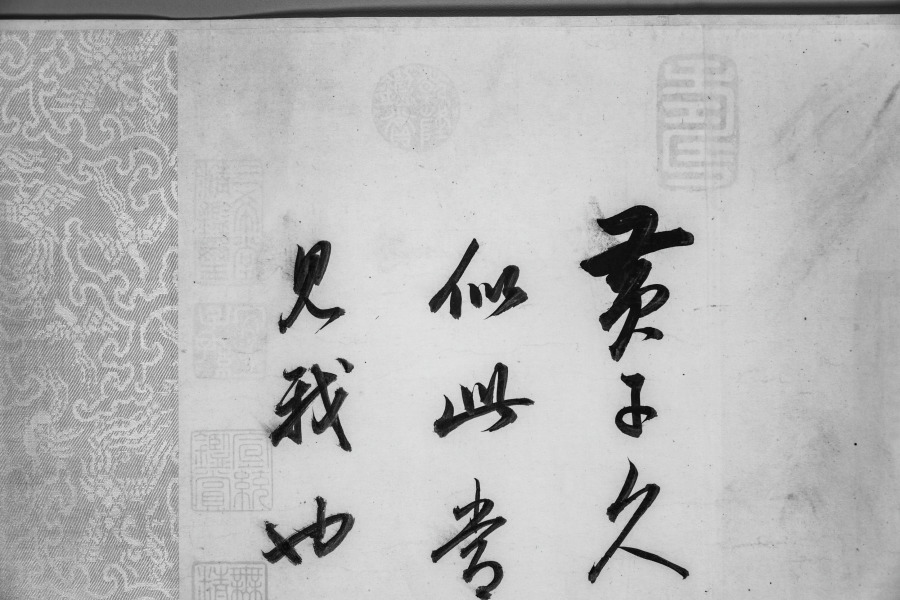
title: River and Mountains on a Clear Autumn Day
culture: China, Ming dynasty (1368–1644)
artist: Dong Qichang (Chinese, 1555–1636)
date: c. 1624–27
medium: Handscroll; ink on Korean paper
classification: Painting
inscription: 黃子久江山秋霽似此，當恨古人不見我也。思翁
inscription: 董文敏每遇高麗鏡面箋，書畫尤為入神。此卷改表紙用之，字跡隱然，兼有朝鮮之印。至於筆法圓秀，真接倪黃。豈文沈所可同日而語也。 康熙庚午中秋後一日，天氣澄爽，重裝初畢，跋於瓶廬。抱瓮翁高士奇。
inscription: Second inscription by Gao Shiqi 高士奇 (1645–1704): On the twenty-third day of the ninth month, the jiaxu year of the Kangxi era [1694], I packed my bags to head north. When my boat passed Wuchang [Suzhou], Mr. Mantang [Song Luo] brought wine to bid me farewell so that we could share our thoughts on our separation in the last few years. I showed him the paintings and calligraphy which I collected and asked his opinions. Since Mr. Mantang does not own any handscrolls by Wenmin [Dong Qichang], I leave this one for him in commemoration of our parting; thus the painting will have a worthy owner and our meeting will become a beautiful story in the future. It is the fourth day after the beginning of winter, with the sky clear and sober. Trees under frost have turned red and yellow, seemingly echoing the brush and ink in the painting. I also ask Mr. Mantang to inscribe a poem to commemorate our meeting so that it will survive forever.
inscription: 1 colophon and 4 seals of Song Luo 宋犖 (1634–1713): Who is the foremost art connoisseur of our dynasty?/ Tangcun [Liang Qingbiao, 1620–1691] is dead, so the title passes to Jiangcun [Gao Shiqi]./ Leaving office, you retired for five years in the Lake region./ Fondling handscrolls and hanging scrolls from morning to evening./ You sent me your collection catalogue Xiao Xia Lu last year;/ It is indeed the true equal of [Zhou Mi's] Yun Yan Guo Yan./ This year you returned to the capital by imperial order;/ Your boat with calligraphy and paintings anchored at the river bank in Suzhou./ When we met each other you did not waste any time for conversation by poured out immediately/ From your "coral net" extraordinary treasures./ You produced incomparable scrolls, with gold-inscribed labels and jade rollers,/ Pouring out from bags and trunks, they were spread in disarray./ Without a word, I rolled and unrolled until my fingers were numbed,/ We sat straight, facing each other quietly, and never felt tired./ For three days we forgot about sleeping and food./ And at times we shouted our joy out loud, forgetting who is host or guest./ Your Dwelling in the Fuchun Mountains and the Yuansheng manuscript/ These peerless works I myself examined with delight./ As an added pleasure to the farewell dinner under the Maple Bridge,/ You allowed me to hold again this handscroll by Dong Qichang--/ The Misty River and Piled Peaks [by Zhao Mengfu] and this Clear Autumn Day are two extraordinary masterpieces./ In showing such life and spirit with "qi yun." the artists were truly "men of heaven."/ The Clear Autumn Day is not even three feet long,/ Painted on tributary Korean paper, it shines like silver./ Every building up and every turn of the mountains imitates nature,/ Every tree and every rock is removed from the commonplace./ From the beginning, the theory of poetry is the theory of painting,/ Like the lotus and the morning sunshine, they complement and refresh each other./ The artist's inscription regrets that "the Old Masters cannot see my scroll."/ Huang Gongwang would have agreed in his grave./ The vermilion of the seals glitter and dazzles the eyes,/ These added accessories are as valuable as jade./ You are very kind to give it to me,/ The feelings expressed in your inscription are so sincere./ Wanting to refuse, but unable, I accept it to respect your wish,/ And taking off my gown and cap I wrapped it with care./ You asked me to write a long poem in commemoration of this beautiful occasion,/ I am too ashamed that my effort in response is so poor and inadequate./ Returning home, I unrolled it under candlelight, trying to write the colophon,/ The light of the waning moon shines at the foot of the mossy wall./ Earnestly humming and brows knit in deep thought, I try to compose;/ The verses are not outstanding, but the facts are real./ With this poem recorded at the end of the scroll, I mail it to you for approval,/ This poem and this painting shall outlast a thousand springs. (Translation by LYSL/HK/WKH)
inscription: 1 colophon and 2 seals of Shao Changheng 邵長蘅 (1637–1704); 2 inscriptions and 14 seals of the Qianlong 乾隆 emperor (r. 1736–95); 1 seal of the Jiaqing 嘉慶 emperor (r. 1796–1820); 3 seals of the Xuantong 宣統 emperor (r. 1908–11); 1 seal unidentified.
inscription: [印] 朝鮮國王之印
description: Dong Qichang had a tremendous impact on the artistic practices and historiography of later generations; his works and writings shaped literati aesthetics. Here, Dong places an abstract landscape composition diagonally across the picture plane, configured to recall earlier masters and simultaneously express his own personal style. Dong’s inscription claims, Huang Gongwang’s Autumn Day, looks like this. I truly regret the master has not seen my work. In fact, Dong Qichang may have had Dong Yuan’s Xiao and Xiang Rivers in mind, a work he owned and considered a key work in Chinese art history.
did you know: The painting has an imprint of a Korean seal that reads "Seal of the king of Joseon."